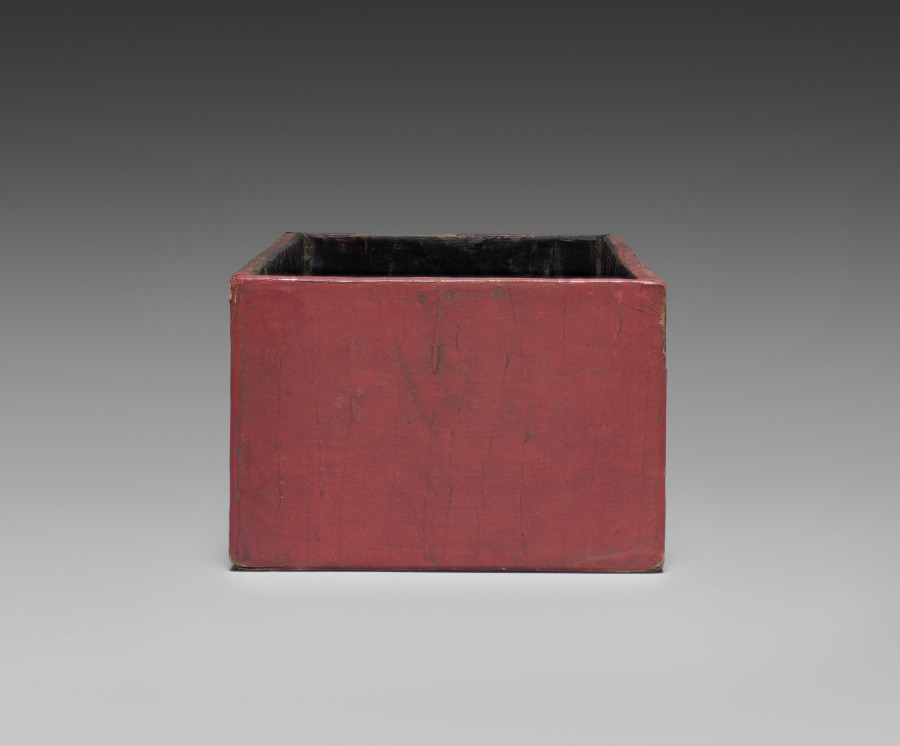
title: Drawer for a Tihong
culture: China, Ming dynasty (1368-1644), Wanli reign (1572-1620)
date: 1585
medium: carved cinnabar lacquer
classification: Lacquer